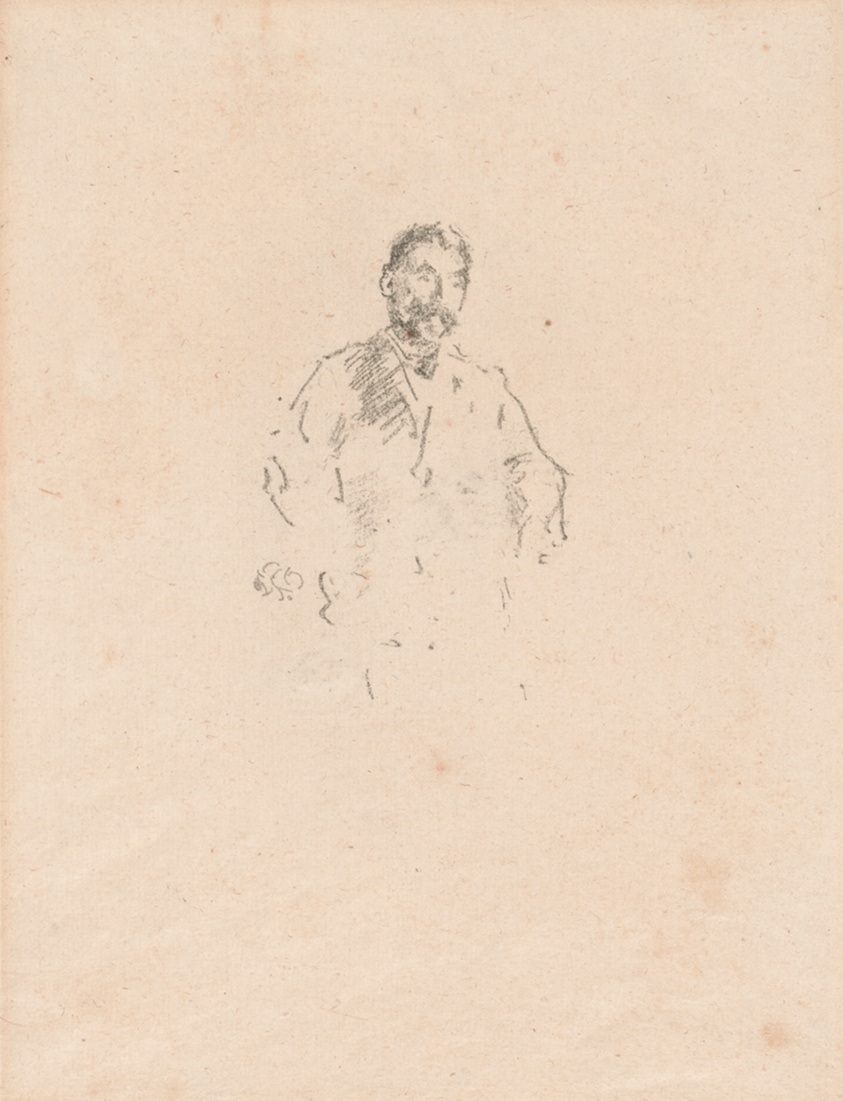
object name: Print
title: Stephane Mallarmé, No. 2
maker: James McNeill Whistler (American, 1834-1903)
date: 1892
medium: Transfer lithograph in black with scraping, on cream laid paper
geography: United States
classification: transfer lithograph; lithograph; print; prints and drawing; paper